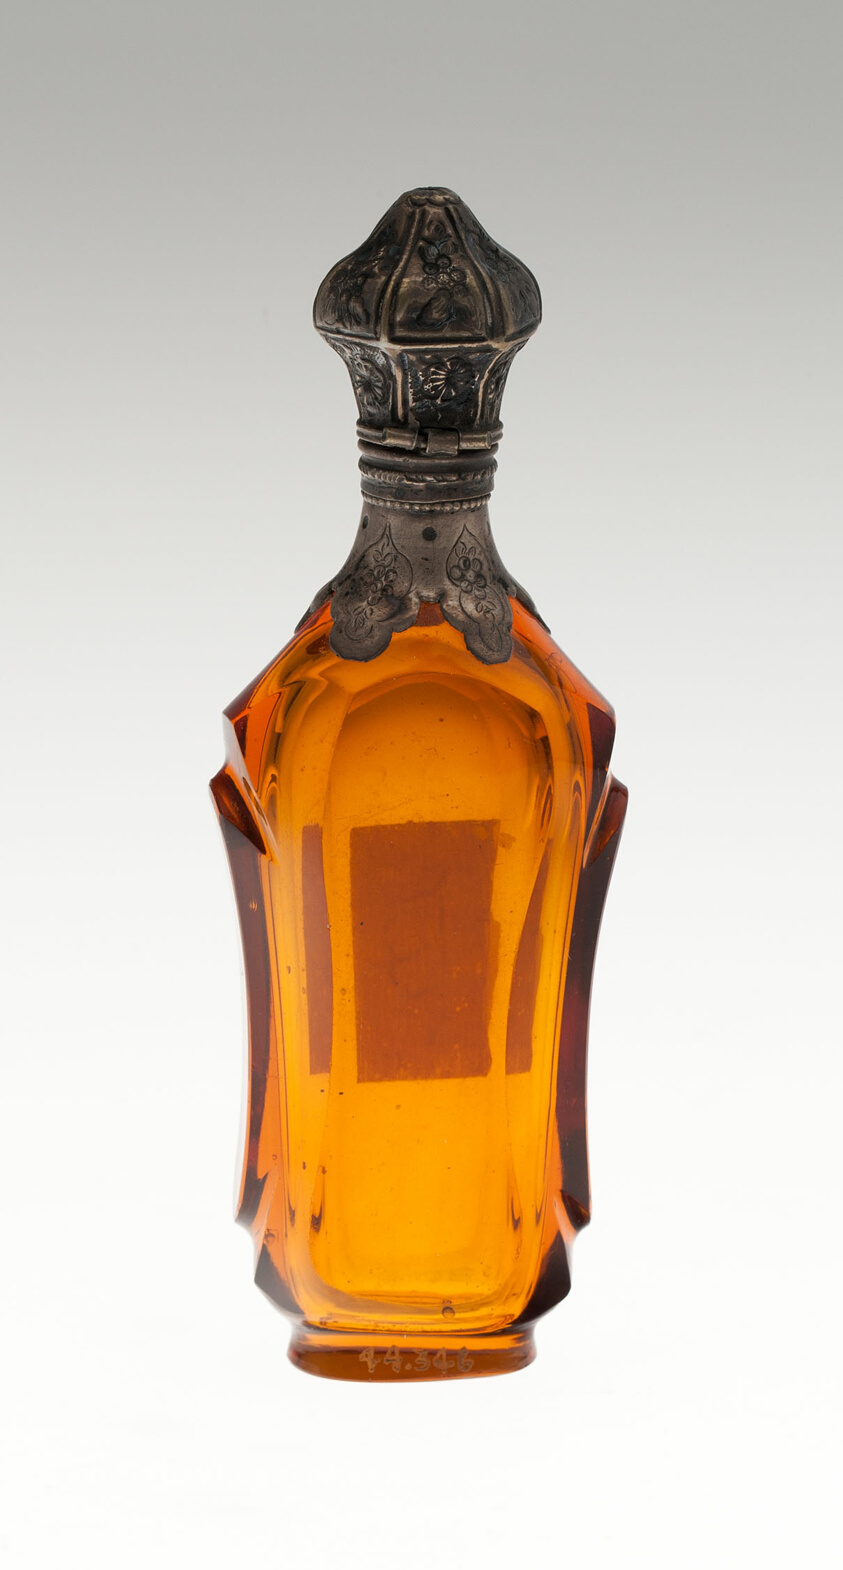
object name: Glass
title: Scent Bottle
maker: Bohemia, Czech Republic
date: c. 1840/50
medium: Glass; cut and colored with metal mounts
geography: Bohemia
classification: glass; european decorative arts